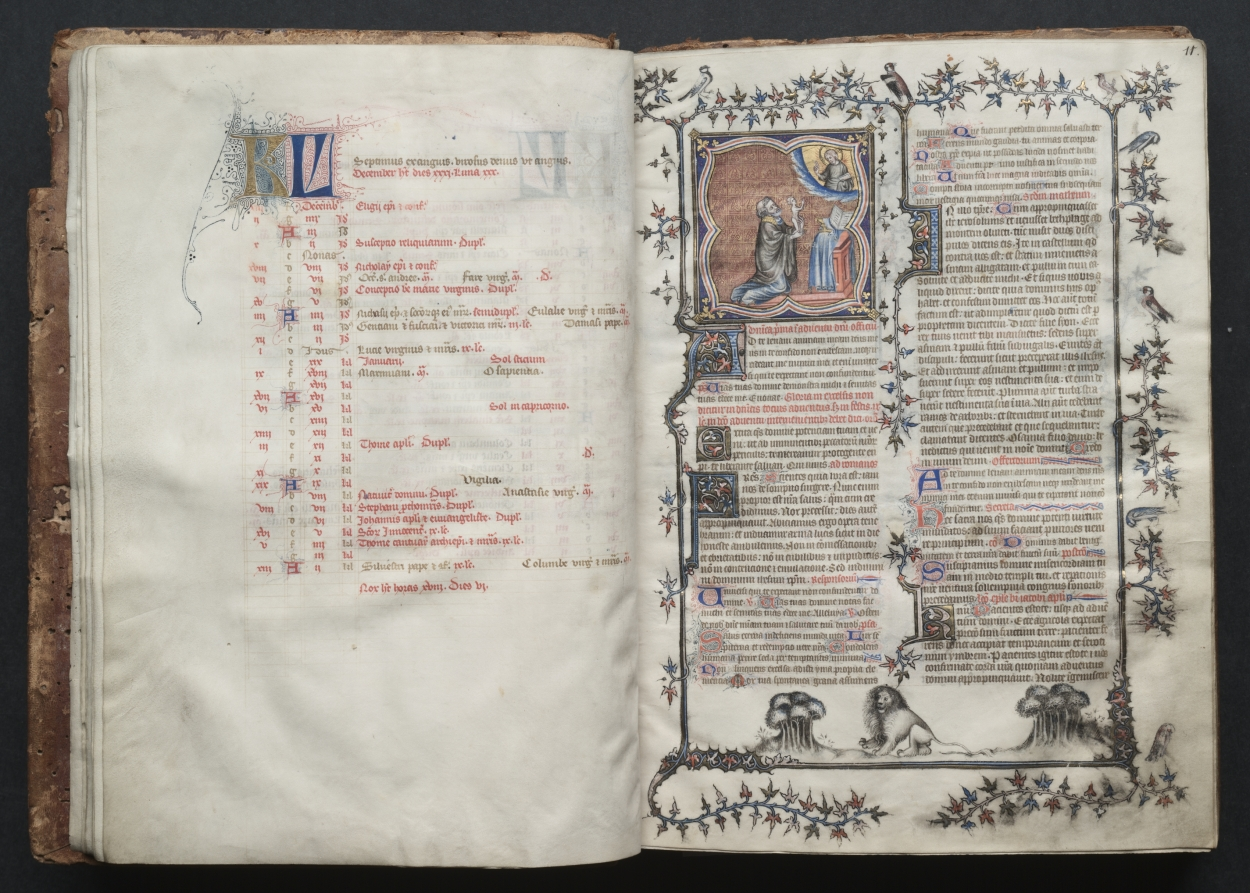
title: The Gotha Missal: Fol. 11r, Offering of the Souls; Bas-de-Page, Lions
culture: France, Paris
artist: Master of the Boqueteaux (French)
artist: and Workshop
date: c. 1375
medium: ink, tempera, and gold on vellum; blind-tooled leather binding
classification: Bound Volume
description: The style and quality of this manuscript's decoration is typical of deluxe Parisian books made for aristocratic or royal patrons. Most of the book's decoration appears to be the work of the Master of the Boqueteaux, an artist active at the court of King Charles V (died 1380). His style was apparently shared by a number of book illuminators working in and around Paris. It is very possible that the Gotha Missal belonged to Charles V, but is not provable because the manuscript has no royal portraits and lacks a colophon. Given the book's magnificent decoration, however, it would seem that it was produced for a Valois prince, if not for the king himself. The manuscript receives its name from the German dukes of Gotha, its later owners.